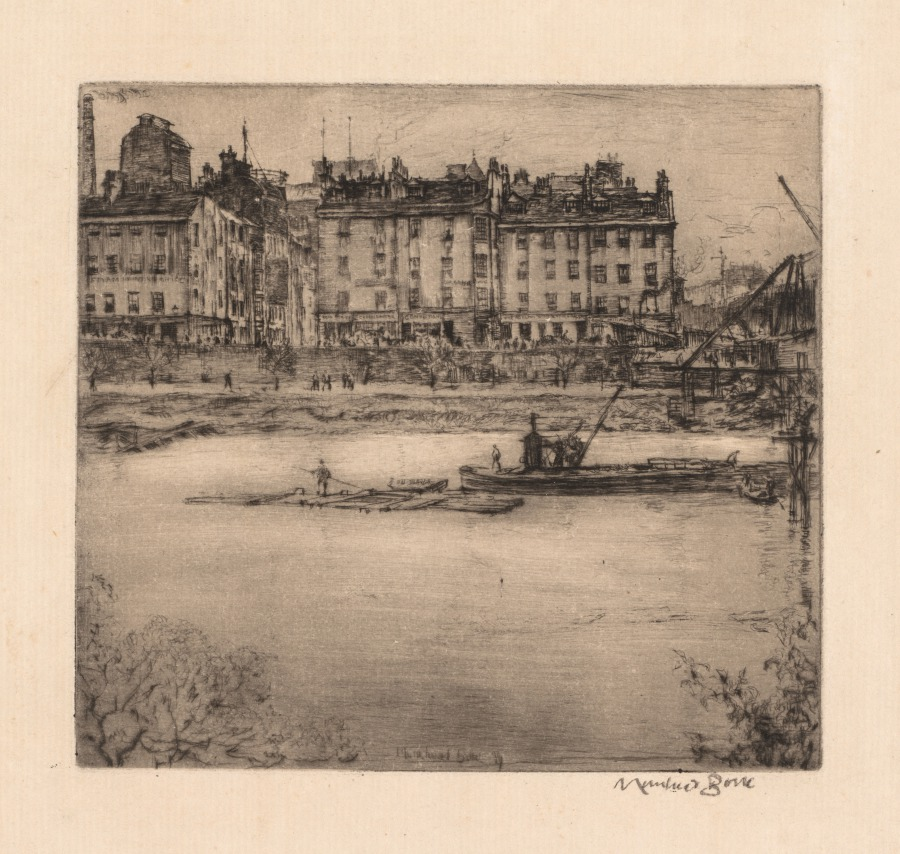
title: Etchings of Glasgow: Gorbals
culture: Britain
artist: Muirhead Bone (British, 1876–1953)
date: 1899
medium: etching and drypoint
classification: Print